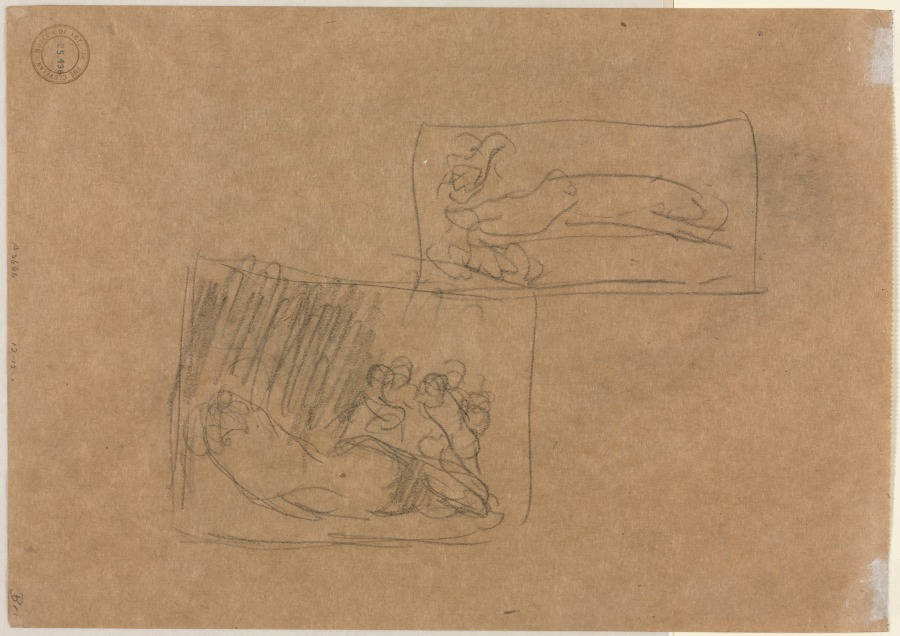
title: Draped Figure Seated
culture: England, 19th century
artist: William Strang (British, 1859–1921)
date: 1905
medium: charcoal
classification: Drawing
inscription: Signed in charcoal, lower right: "W. Strang 1905"